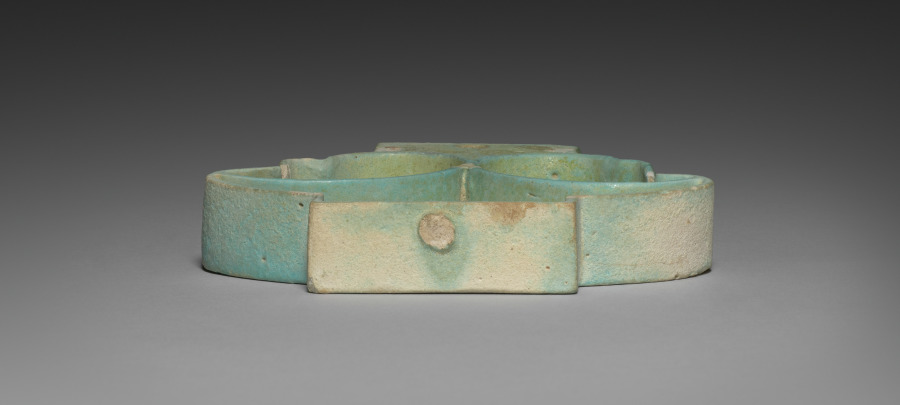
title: Box (Pyxis) in the Form of a Composite Capital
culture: Egypt, Greco-Roman period (332 BCE–395 CE), Ptolemaic dynasty (305–30 BCE)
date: 305–30 BCE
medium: pale robin's-egg blue faience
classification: Vessels